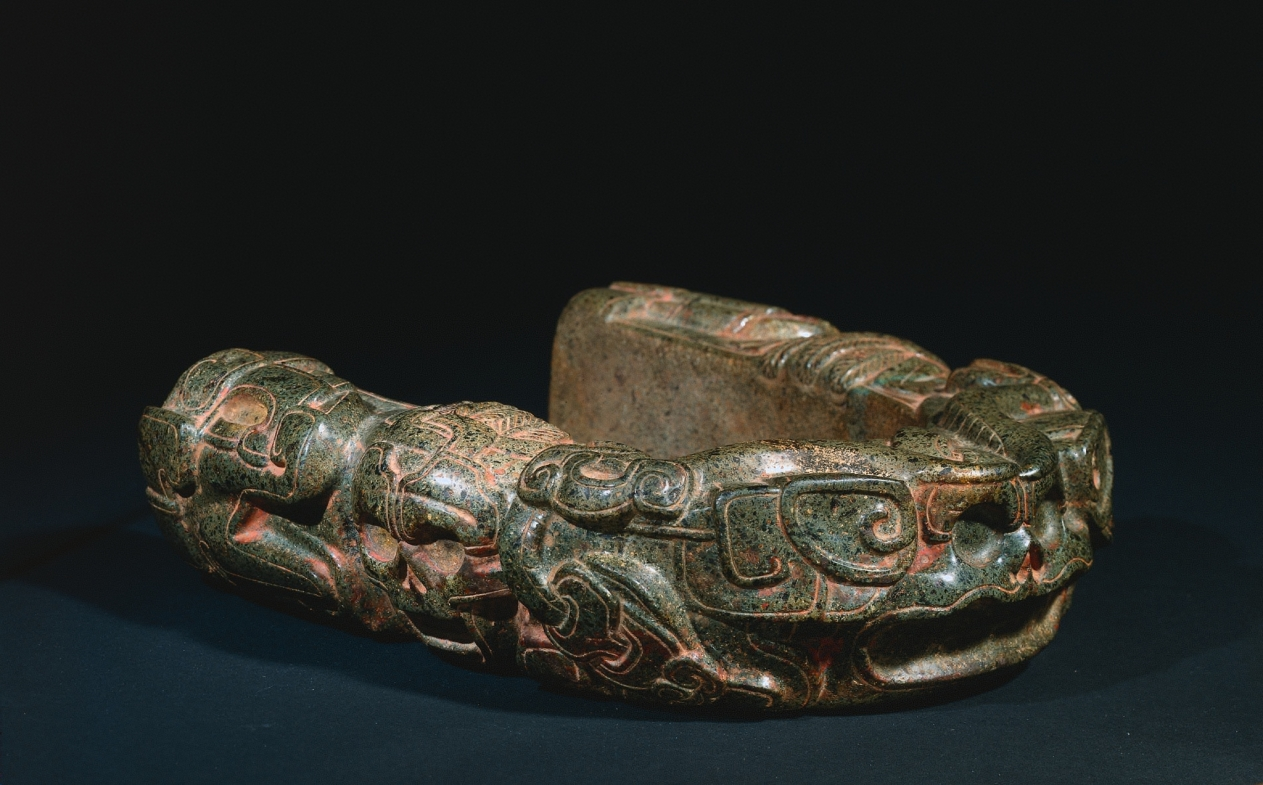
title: Ballgame Hip Protector (Yoke)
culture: Mexico, Gulf Coast, Classic Veracruz style (600-1100)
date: 600–900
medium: greenstone, pigment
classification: Sculpture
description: U-shaped ballgame sculptures imitate the shape of belt-like protectors, perhaps made of wood and padding, worn to shield ballplayers from injury when they returned the solid rubber ball from their hips. This fine example embodies a major theme of the ballgame: the connection between fertility and death. It is made of greenstone, a precious material that through its color symbolizes the lush burgeoning of nature after the rainy season. The imagery, however, is menacing: a monstrous head snarls from the curve, and human skulls appear on the sides.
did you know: The ballgame was a team sport played on specially constructed rectangular courts and involved striking a large solid rubber ball without using your hands.